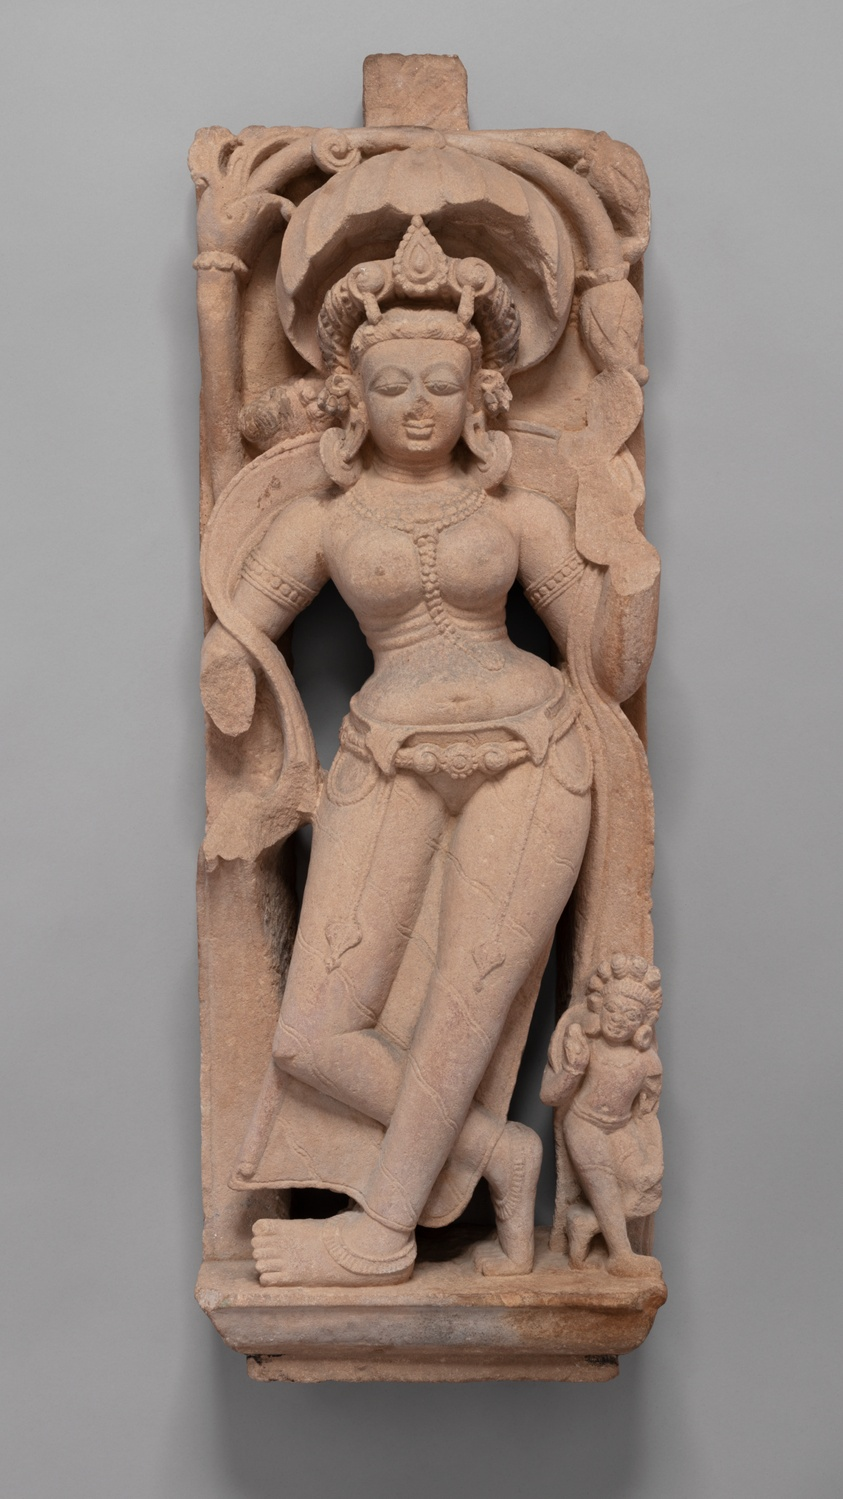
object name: Sculpture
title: Celestial Beauty (Apsara)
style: South Asian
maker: India; Rajasthan, Osian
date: 8th century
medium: Sandstone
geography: Rajasthan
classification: sandstone; stone; sculpture; asian art